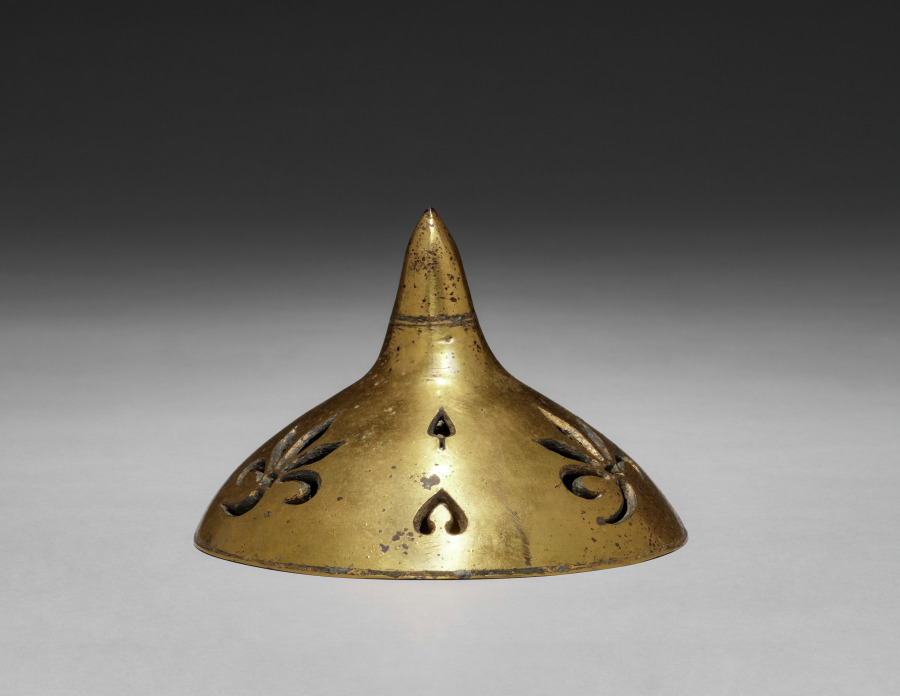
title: Censer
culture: China, Tang dynasty (618-907)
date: early 600s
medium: gilt bronze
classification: Metalwork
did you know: The censor's pointed cover is decorated with openwork floral motifs.